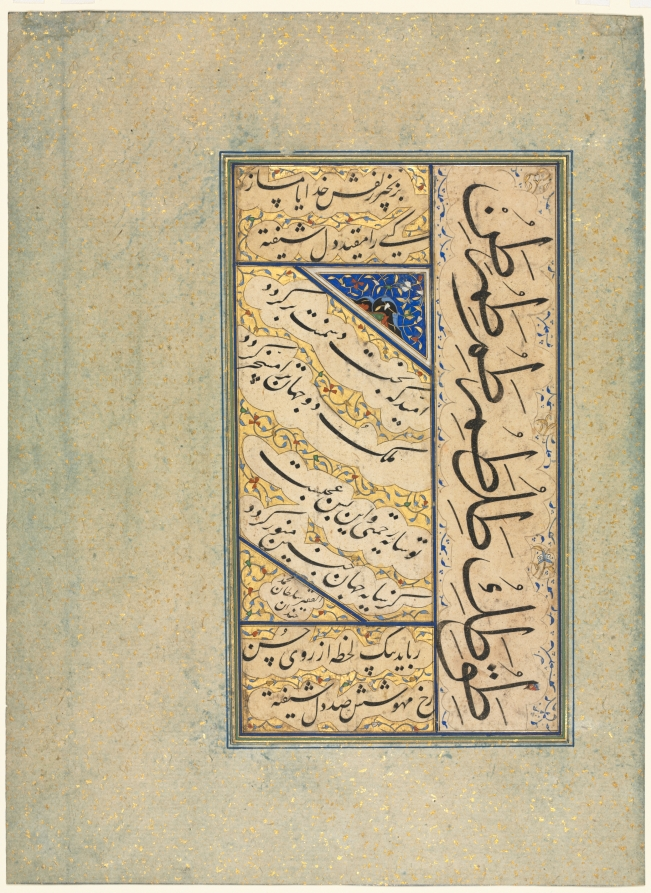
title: Persian Quatrains (Rubayi) and Calligraphic Exercises (recto)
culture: Afghanistan, Herat, Safavid period (1501–1722)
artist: Sultan Muhammad Khandan (Iranian, d. after 1550)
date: c. 1509–59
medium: ink, gold, and opaque watercolor on paper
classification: Manuscript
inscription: Al-faqīr Sulṭān Muḥammad Khandān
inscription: [Persian quatrain]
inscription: [Persian quatrain]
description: This page contains two quatrains—poems made up of four lines. The diagonally written text in the center of the page is a poem addressed to a ruler, expressing hope for his success and the downfall of his enemies. The second poem is split between the horizontal panels at the top and bottom of the page. This quatrain praises the beauty of the writer’s beloved, saying that “her moonlike face can steal away a hundred besotted hearts.” At the right are calligraphic exercises displaying letters of the alphabet and the virtuoso skill of the calligrapher Sultan Muhammad Khandan, who signed the page in the triangle at the lower left of the inner text block.